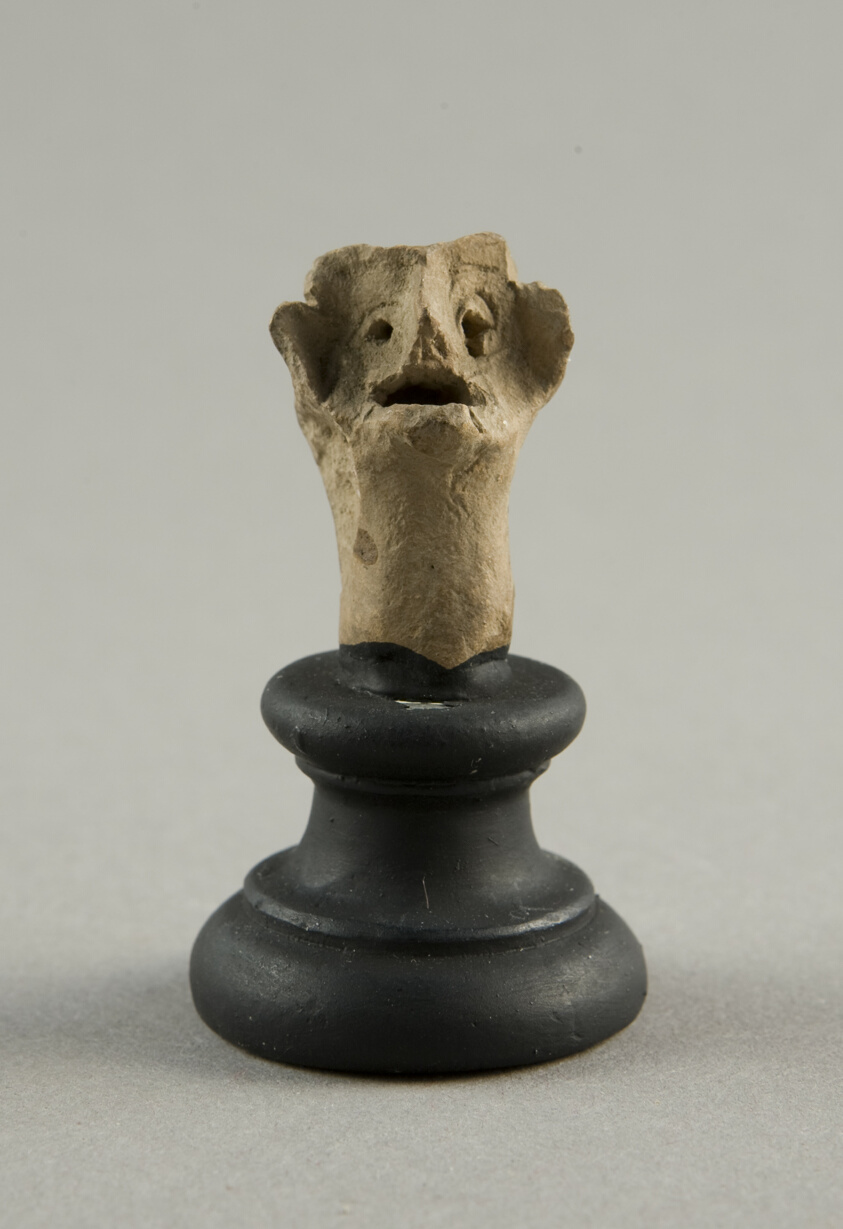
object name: Sculpture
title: Abstract Head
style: greek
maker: Greek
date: 3rd-1st century BCE ?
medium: terracotta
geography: Greece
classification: earthenware; ceramics; sculpture; ancient art